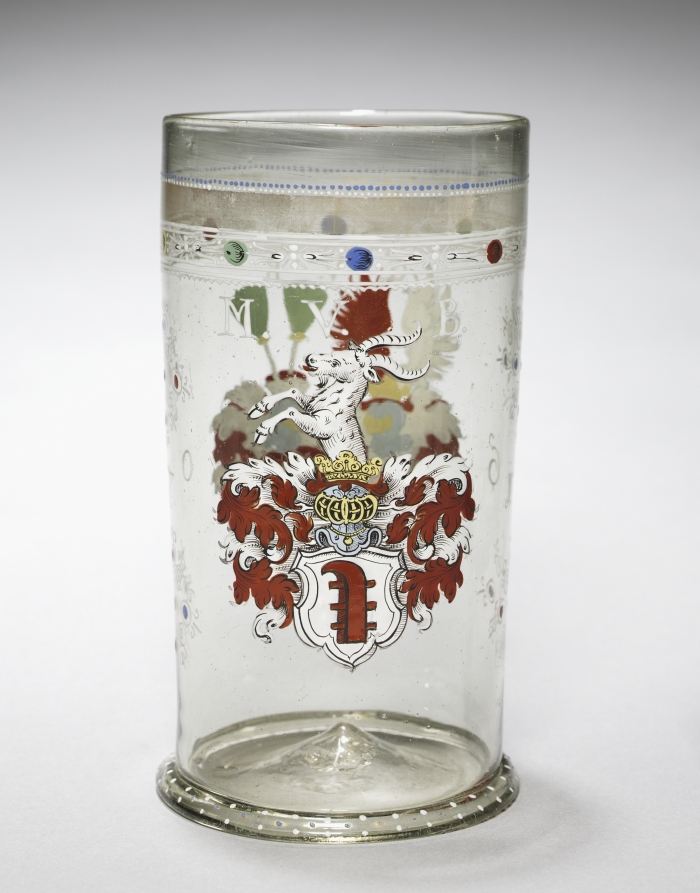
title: Beaker with Coats-of-Arms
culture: Germany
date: 1607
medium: enameled glass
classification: Glass